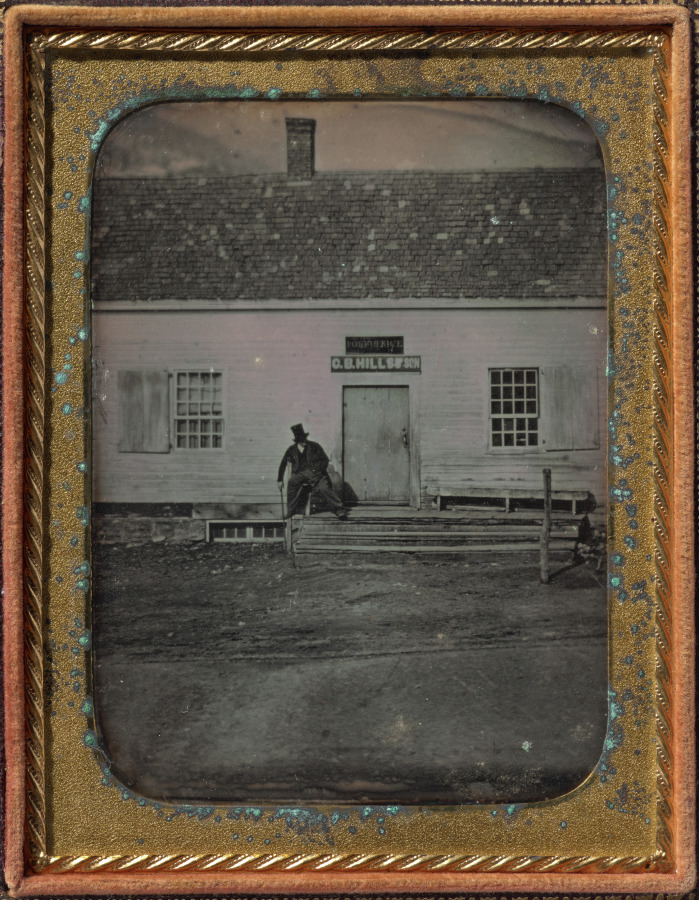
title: Cyrus B. Hills, Postmaster, Arlington, Vermont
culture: America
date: c. 1852–53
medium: daguerreotype, quarter plate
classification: Photograph